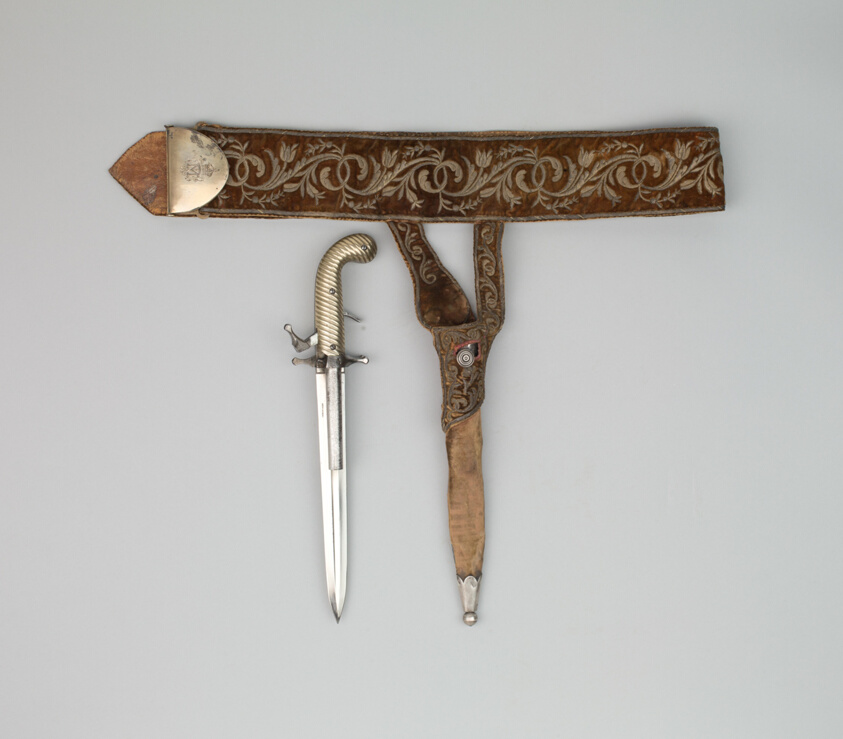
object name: Arms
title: Combination Hunting Dagger and Double-Barrel Percussion Pistol, Sheath, and Belt of Emperor Maximilian of Mexico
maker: Joseph-Célestin Dumonthier (France, Paris, active 1850–1900)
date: 1864/67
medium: Steel, brass, silver, gilding, leather, silk velvet, and silver-gilt thread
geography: Paris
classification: combination weapon; arms; arms and armor